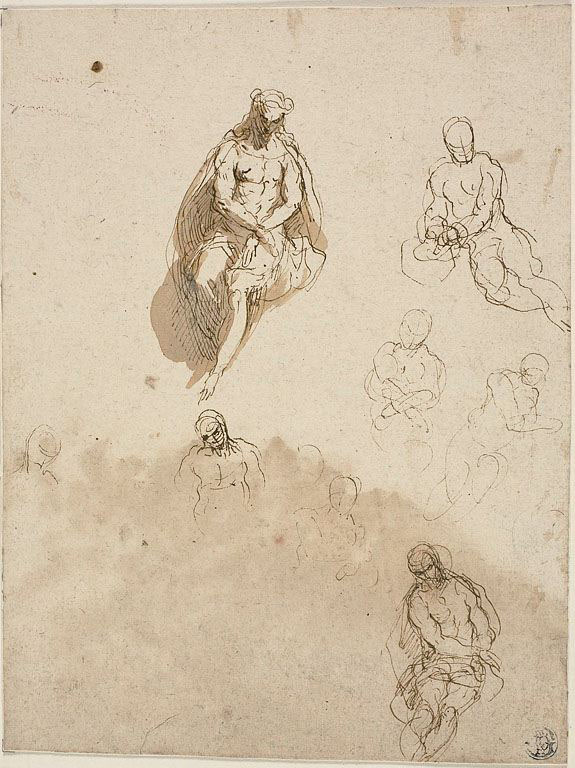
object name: Drawing and Watercolor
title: Studies for the Crowning with Thorns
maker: Jacopo Negretti, called Palma il Giovane; Italian, c. 1548-1628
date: 1592/1600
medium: Pen and brown ink with brush and brown wash, on ivory laid paper, laid down on ivory laid paper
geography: Italy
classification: ink with wash; drawings (visual works); prints and drawing